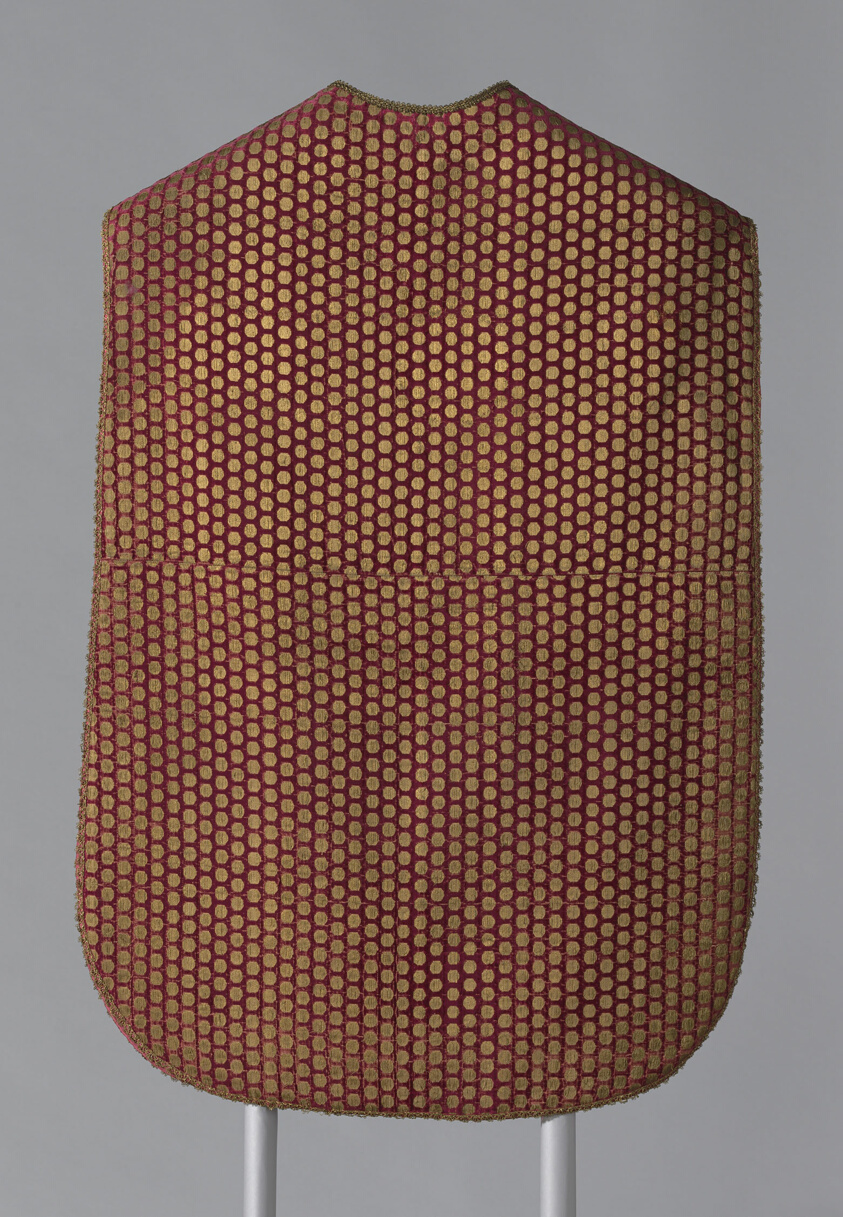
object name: Textile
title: Chasuble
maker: Iran (Persia, Tabriz)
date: Late 13th/14th century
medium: Silk, plain weave with twill interlacings of secondary binding warps and gilt-animal-substrate-wrapped silk supplementary facing wefts; supplementary pile warps forming cut voided velvet; edged with gilt-metal-strip-wrapped silk, bobbin-made tape; lined with silk, plain weave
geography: Tabriz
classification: textile; weaving - velvet; weaving; liturgical